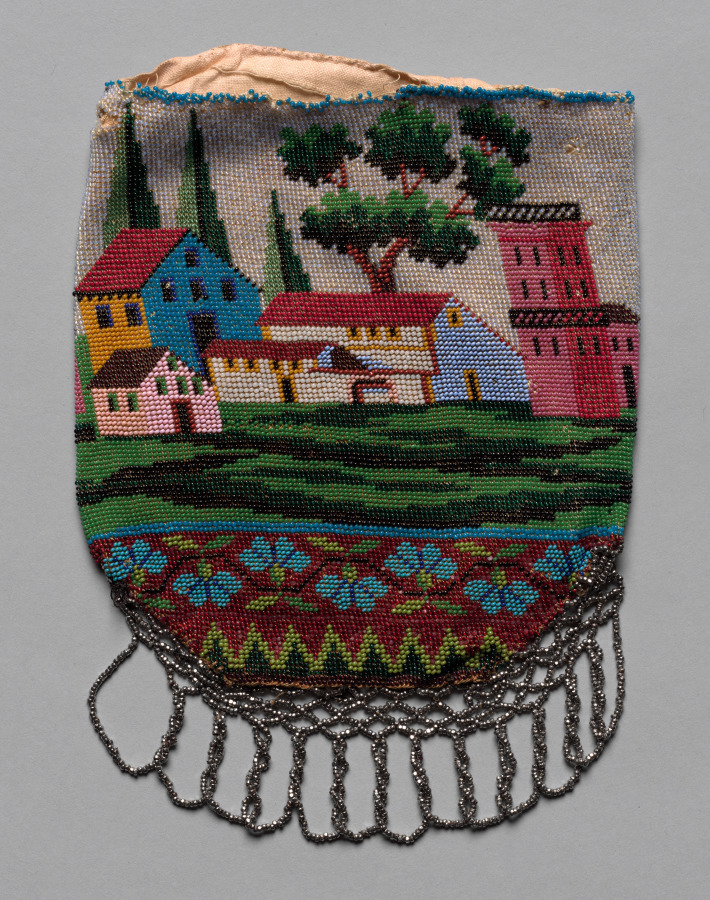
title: Beaded Bag (landscape scene)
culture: America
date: 19th century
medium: metal beads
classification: Garment